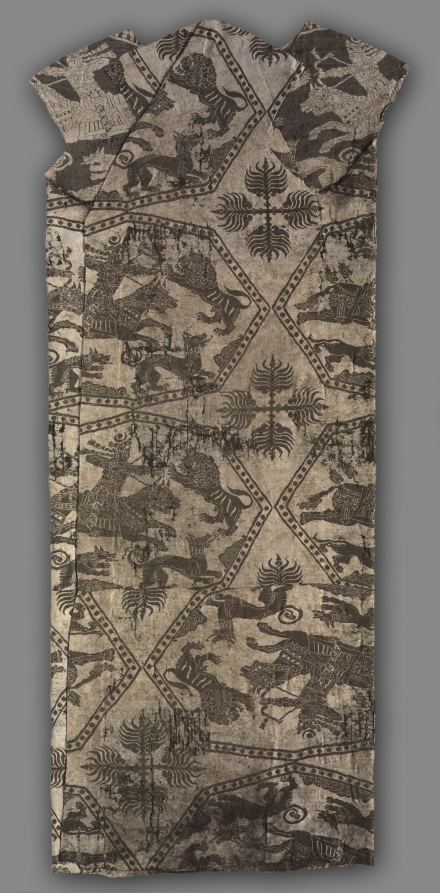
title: Fragment of a Caftan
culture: Iraq or Iran, in the style of the Buyid period (945–1055)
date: before 1982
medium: Silk: lampas weave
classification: Textile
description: This fragment from a caftan features large-scale flattened octagons with pearled borders that contain a royal hunting scene: a king mounted on a running horse draws his bow at a rampant lion. Two dogs with their tongues out also run towards the lion. The star-shaped interspaces are filled with four radiating palmettes.